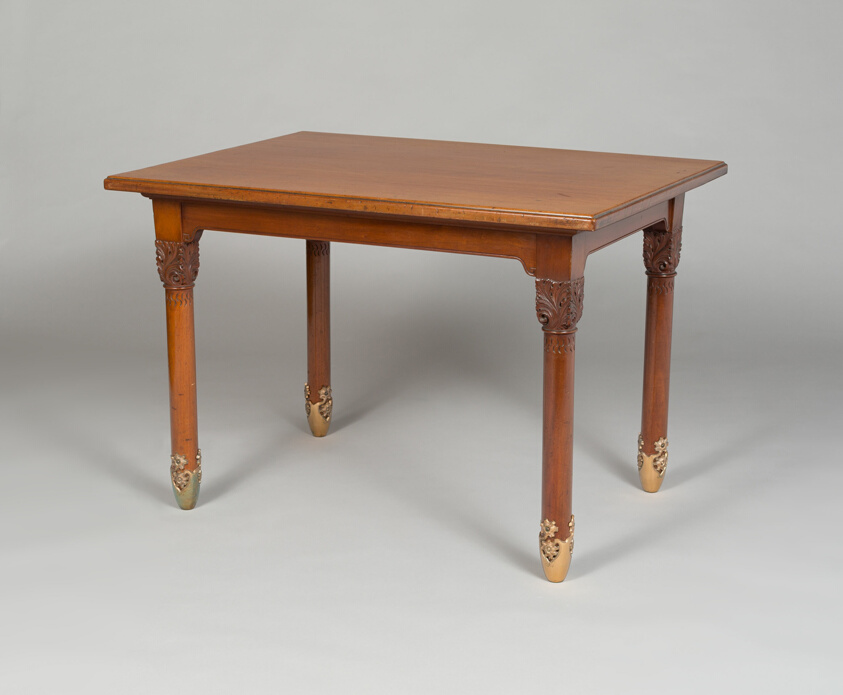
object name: Furniture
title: Table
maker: Herter Brothers (American, 1846–1906)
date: 1885–95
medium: Mahogany with bronze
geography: New York City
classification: table; furniture; american decorative arts; american arts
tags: furniture